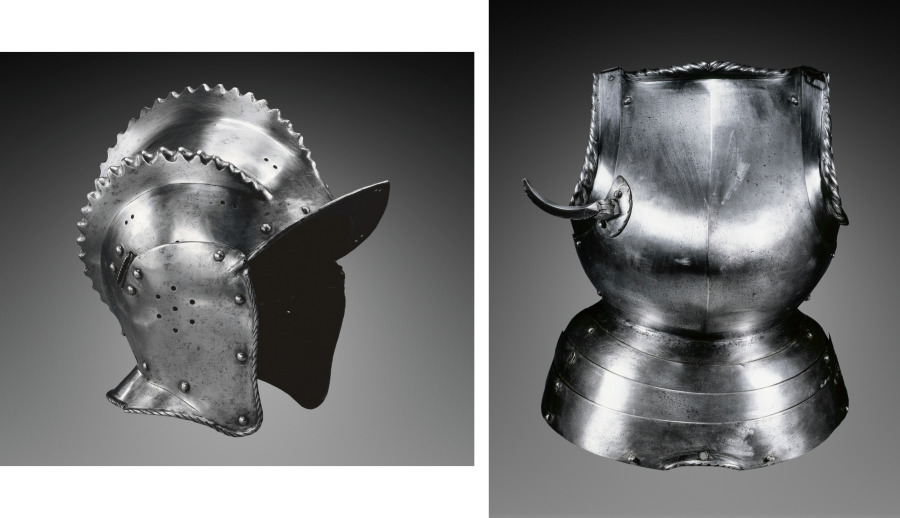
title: Elements from an Armor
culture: Germany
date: c. 1540–70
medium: steel, leather bands; steel; steel and leather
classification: Arms and Armor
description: A full suit of armor comprises over a dozen different pieces. Here there are several elements including a burgonet, a gorget, pauldrons, and a breastplate. Popular throughout the 1500s and 1600s, the burgonet was a light, open headpiece favored by cavalry and infantry alike. Its main features are a peak over the eyes and hinged cheekpieces that fasten with a strap or lace under the chin. A gorget is an element of armor that protects the neck, throat, and upper part of the chest. It normally consists of two parts, front and back, joined by a hinge on the left shoulder and fastened with a stud on the right. A pauldron is a component of plate armor that covers the shoulder and often the armpit, and parts of the back and chest as well. The breastplate is an element that protects the chest and abdomen and is normally worn with a backplate.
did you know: Although all these elements were accessioned together, they are not from the same original suit.